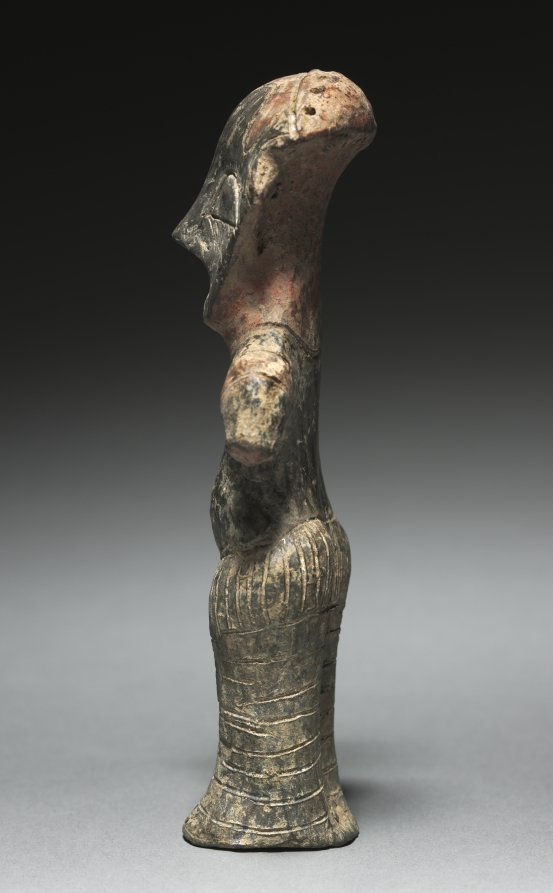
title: Vinca Idol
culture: Serbia, Vinça culture, Neolithic Era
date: 4500–3500 BCE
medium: fired clay with paint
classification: Ceramic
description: This statuette, probably a cult idol, dates to the Neolithic Era which saw the development of farming and human technology. It is extraordinarily well preserved and derives from the settlement at Vinca in modern Serbia. This flourishing culture was the largest known in Europe at that time, extending along the Danube into the Balkans and Central Europe. Thousands of clay statuettes have been discovered in the region's Vinca settlements suggestive of the intense magic-religious practices within the Vinca culture. This statuette is anthropomorphic, or human-shaped, and is presumed to have been used for ritual purposes. The use of red paint is typical of Vinca Neolithic figurines, and few have survived in such excellent condition.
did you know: If you look closely, you can see remnants of red pigment on this diminutive figure.